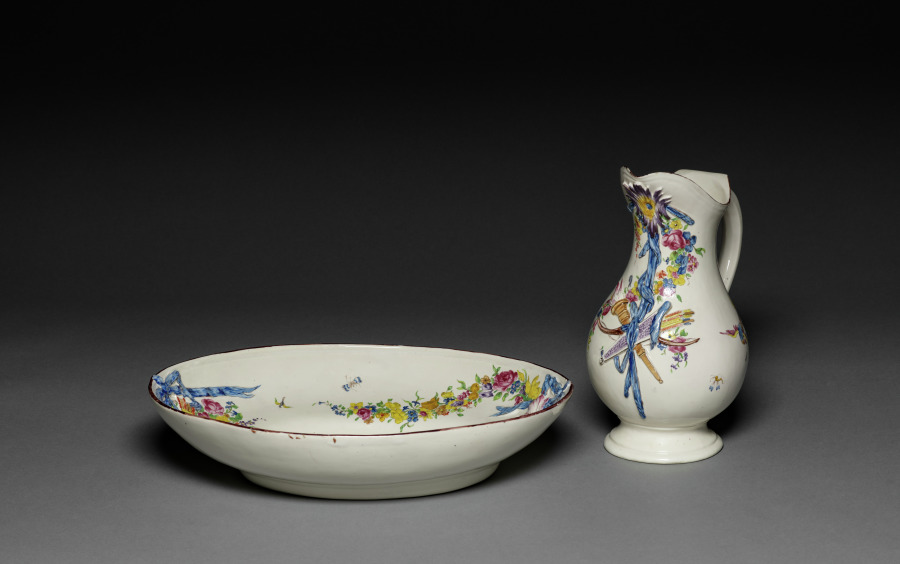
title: Ewer and Basin Pair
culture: France, Chantilly, 18th century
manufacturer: Chantilly Porcelain Factory (French)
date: c. 1770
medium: soft-paste porcelain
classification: Ceramic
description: On the basis of the style of its decoration, particularly the symbolic trophies of love derived from the repertoire of classic ornament, this ewer and basin can be dated c. 1770. At this period, the output of the Chantilly factory was largely restricted to comparatively utilitarian table wares; pieces such as these are quite rare.